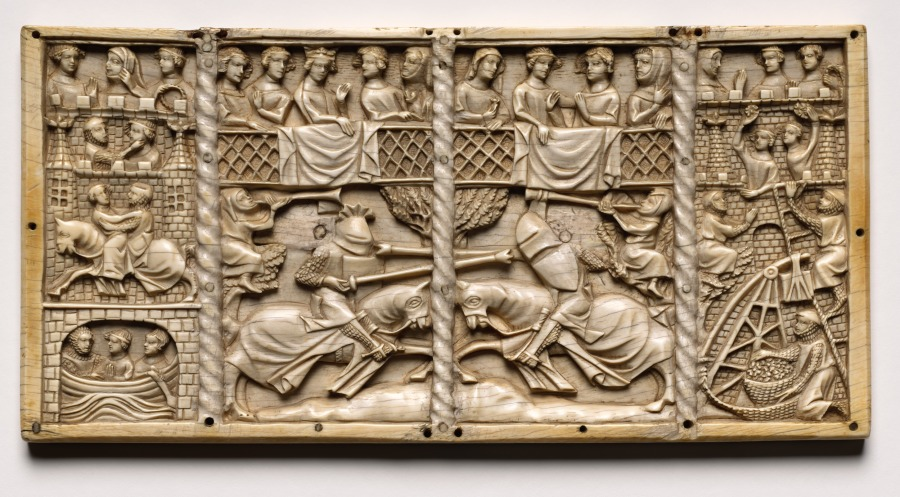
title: Panel from a Casket with Scenes from Courtly Romances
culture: France, Lorraine?, Gothic period, 14th century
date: c. 1330–50 or later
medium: ivory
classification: Ivory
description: Among the most lavish and deluxe products of French ivory workshops of the 1300s were large caskets carved with elaborate scenes drawn from courtly romances. The panel shown here comes from such a casket. The largest panel (here) once formed the lid and depicts a tournament, the most splendid and romantic of knightly activities. Just to the right is a favorite allegory of chivalric love: knights assaulting the castle of love. These images suggesting chivalry, fertility, virginity, youth, and an idealized courtly love likely derive from manuscripts including the Roman de la Rose and the poems of Chrétien de Troyes. Such texts were often found within the libraries of the aristocracy, so the casket’s symbolic images would have been readily understood. Such caskets may have originally been gifts between a man and a woman. The expense of the material, ivory, suggests they were produced for an elite, aristocratic clientele.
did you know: Two knights in mail surcoats and helms joust here with blunted lances "for courtesy," a version of the joust known as the Joust of Peace.